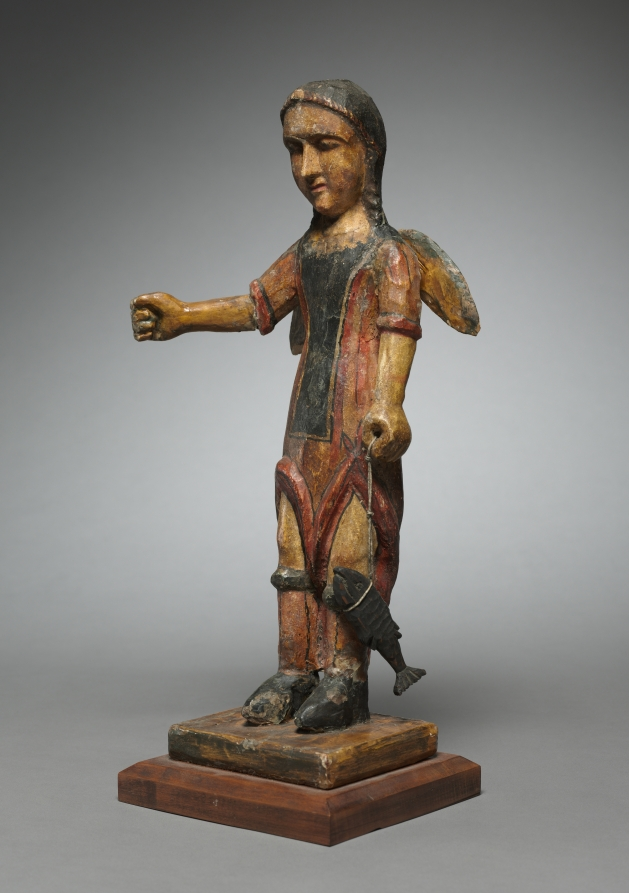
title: San Rafael - Archangel: santo de bulto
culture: America, New Mexico, 17th-18th century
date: 1600s-1700s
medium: painted wood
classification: Sculpture